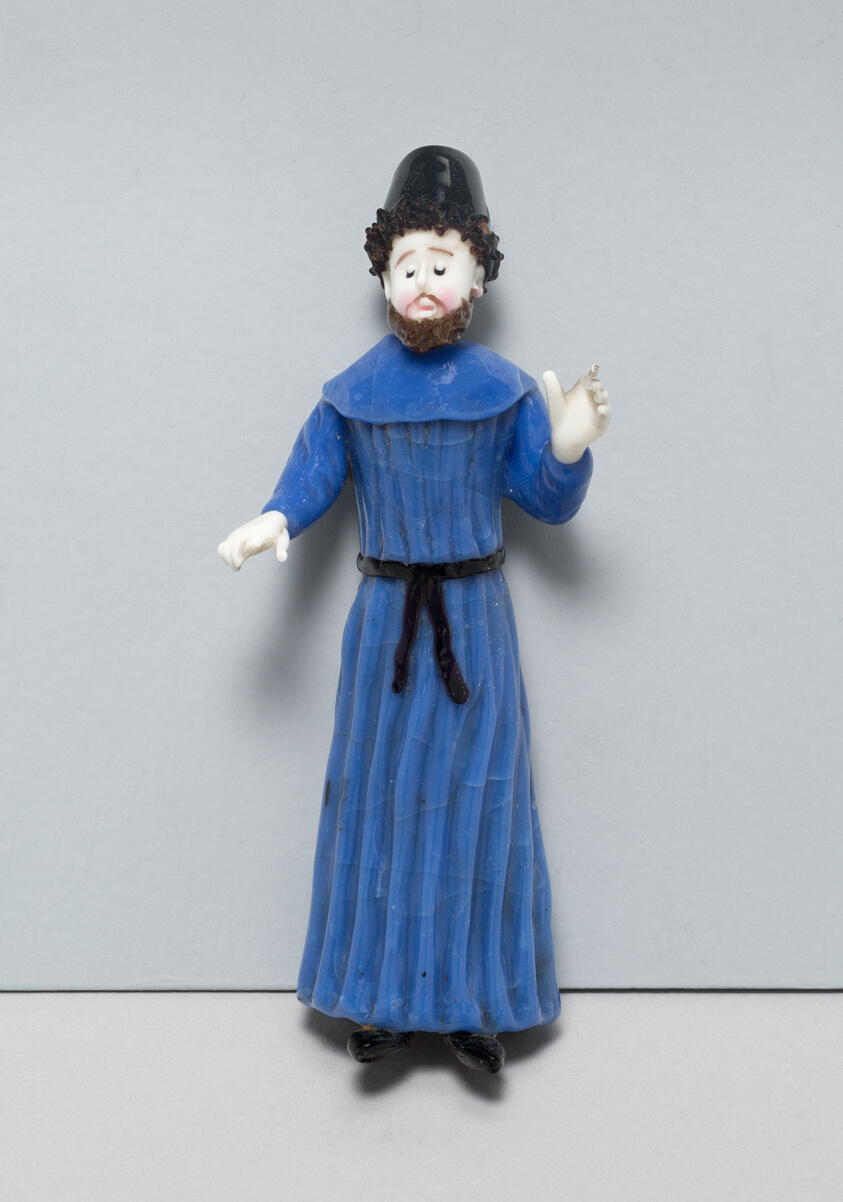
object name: Glass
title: Man with a Black Fez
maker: Nevers, France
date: 1750/99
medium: Glass; lampwork (verre de Nevers), metal armature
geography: France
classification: decorative object/ornament; lampwork; glass; european decorative arts